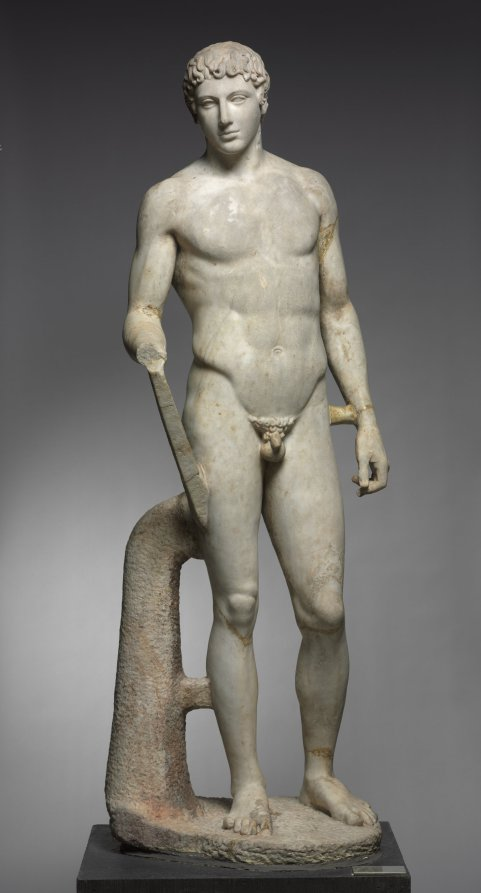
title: Statue of an Athlete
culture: Italy, Roman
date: 1–100 CE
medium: marble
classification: Sculpture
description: This idealized athlete recalls Greek sculptural types invented and popularized during the 400s BC. Large-scale athletes and other sculptures like this were originally created by famous artists as sanctuary dedications. Centuries later, they were widely copied and adapted by Roman sculptors, whose clients sought their own versions of earlier masterpieces. Working in marble rather than bronze, these sculptors added certain elements for stability, such as the struts and the large tree trunk beside the right leg here. Sculptures like this one are profoundly complex, made by and for Romans but descended from Greek ancestors.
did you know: For many years, this sculpture stood in the rotunda of the Cleveland Museum of Art.